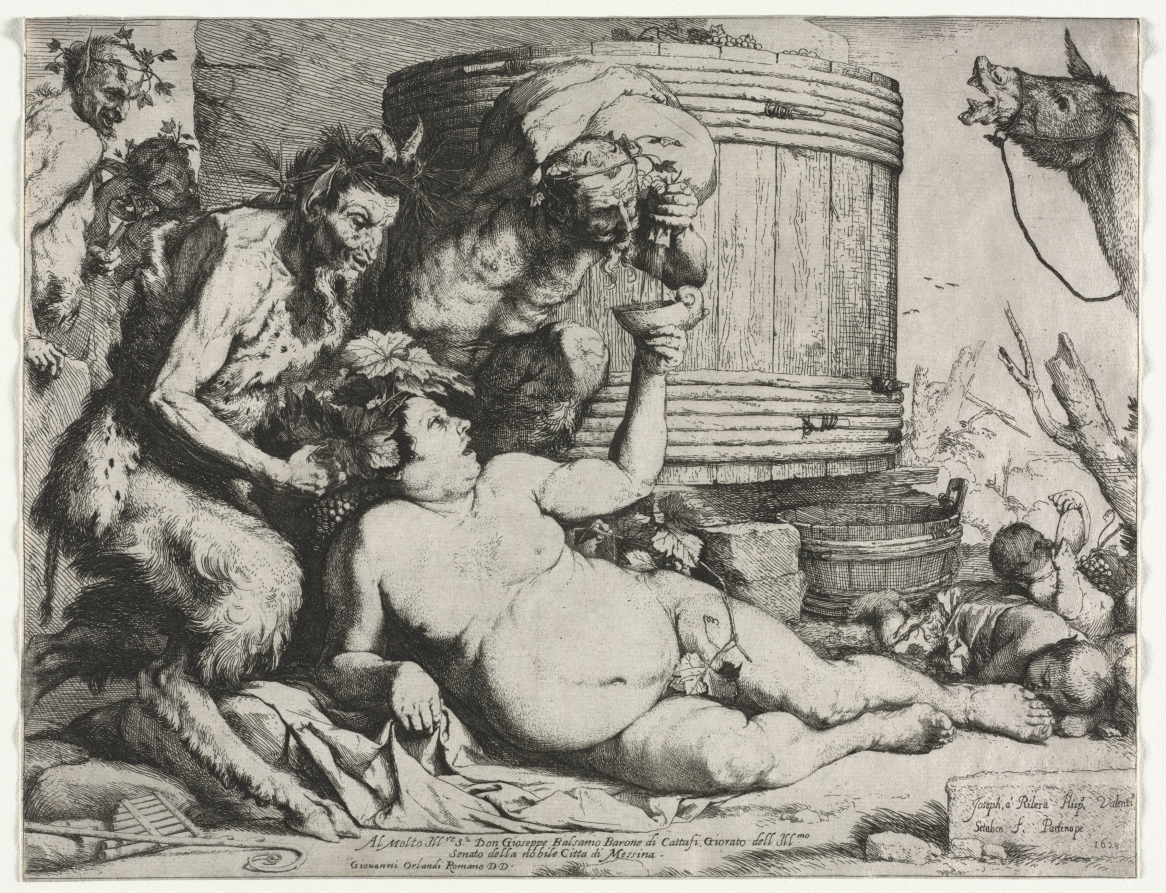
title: Silenus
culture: Spain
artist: Jusepe de Ribera (Spanish, 1591–1652)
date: 1628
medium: etching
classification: Print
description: Before a large wine barrel, Silenus (Bacchus’s teacher) lies inebriated on the ground as he raises his cup to receive wine from a satyr in this print. Jusepe de Ribera included these and other details indicating that the scene was intended to be humorous. Two infants mimic Silenus, and a braying donkey adds to the chaotic setting. Pan, patron of shepherds, with his pipe and staff at his feet, crowns Silenus with grapevines. A satyr and a maenad, at upper left, contribute music as well as sexual innuendo (implied by the placement of the satyr’s flute). Ribera drew inspiration from Andrea Mantegna’s bacchanalia image but he introduced more texture and sensuality to the subject matter through his rich etching technique.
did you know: Corpulent bodies were often used in early modern art to symbolize laziness, overindulgence, and moral corruption.